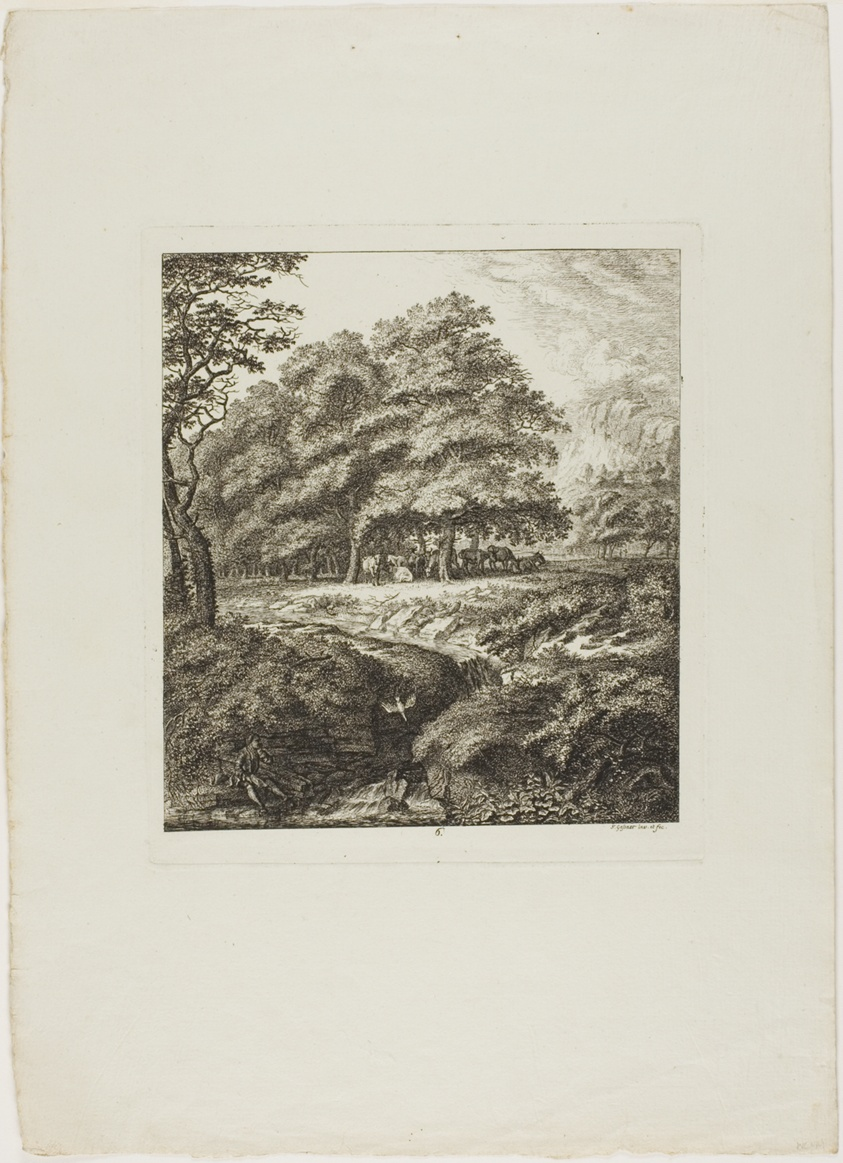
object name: Print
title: Man Reading a Book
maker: Salomon Gessner (Swiss, 1730-1788)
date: 1764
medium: Etching on cream laid paper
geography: Switzerland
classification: etching; print; prints and drawing